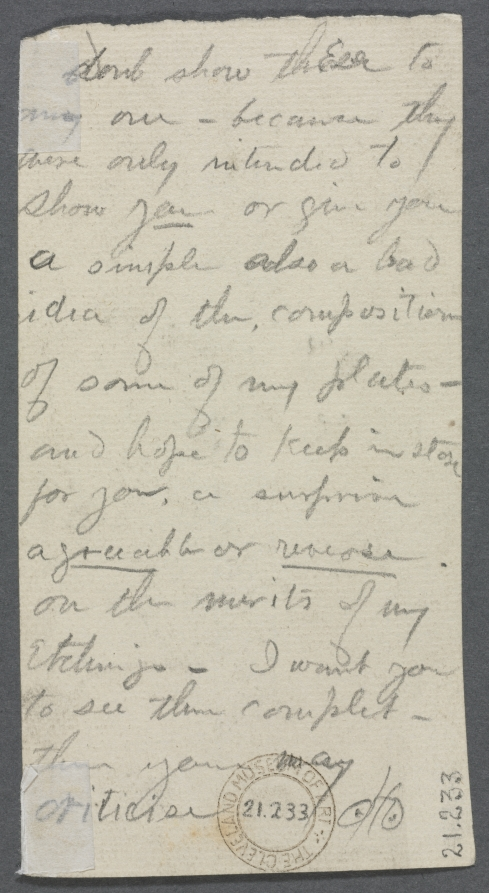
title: Lustheim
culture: America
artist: Otto H. Bacher (American, 1856–1909)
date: c. 1870–1909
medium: pencil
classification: Drawing